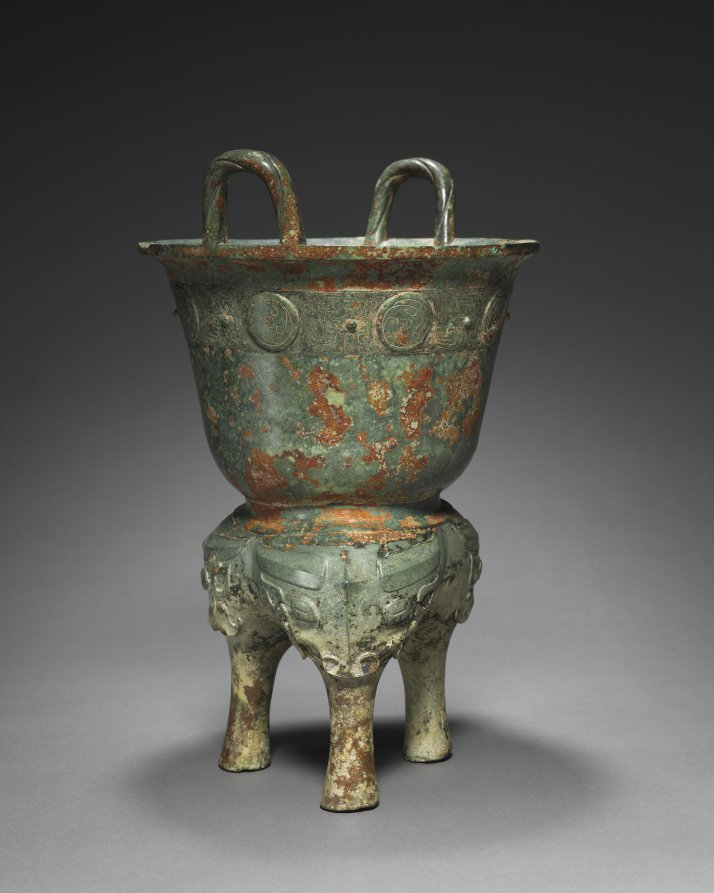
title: Food Steamer (Xian)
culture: China, Shang dynasty (c. 1600–c. 1046 BCE), Anyang phase (c. 1250–1046 BCE) to Western Zhou dynasty (c. 1046–771 BCE)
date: c. 1000 BCE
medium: bronze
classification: Metalwork